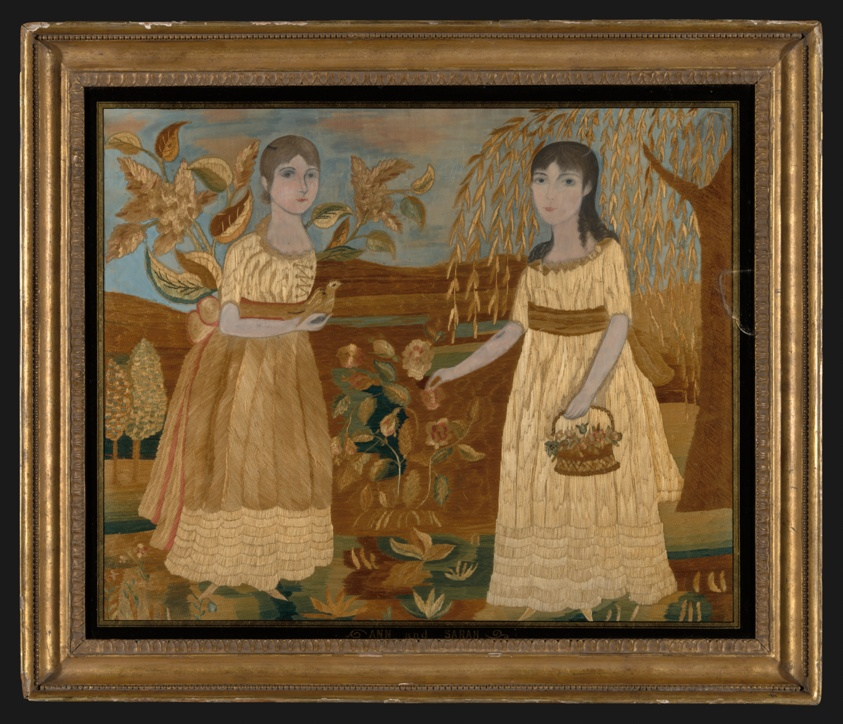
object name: Textile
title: Picture Depicting Ann and Sarah (Needlework)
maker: United States, probably New York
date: early 19th century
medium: Silk, plain weave; painted; embroidered with silk in satin and stem stitches; French knots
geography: New York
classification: textile; needlework (visual works)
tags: women, trees, flowers